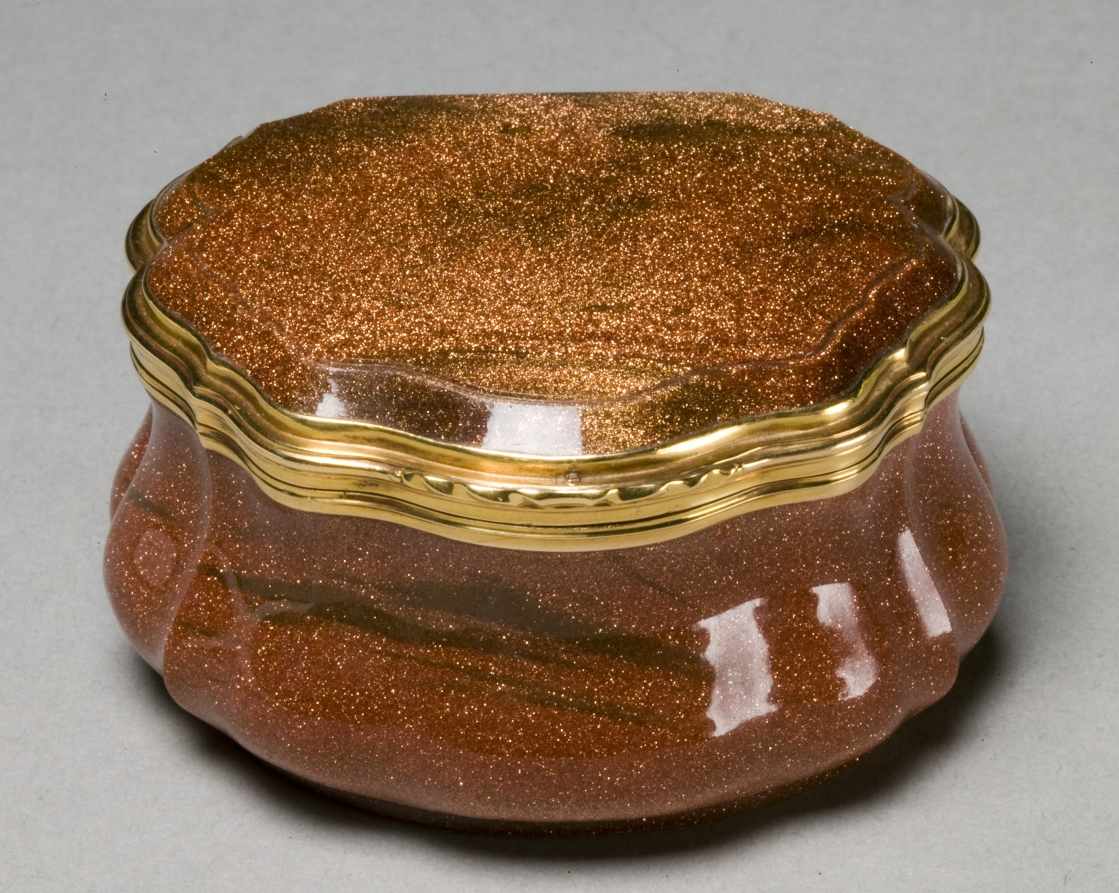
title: Snuff Box with Portrait of Maria Anne Sophia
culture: Germany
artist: attributed to Frederik Fabritius (German, 1685–1755)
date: c. 1730–60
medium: averturine, gold, enamel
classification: Miscellaneous